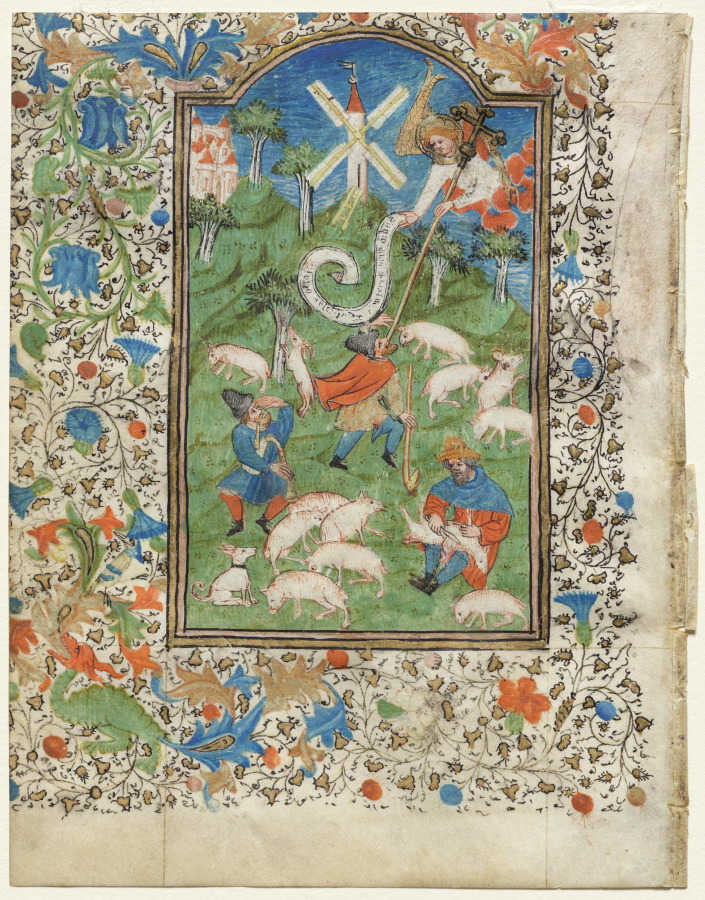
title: Annunciation to the Shepherds: Leaf from a Book of Hours (1 of 6 Excised Leaves)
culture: France, Metz, 15th century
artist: Henri d'Orquevaulx (French)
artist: or Workshop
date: c. 1420–30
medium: ink, tempera, and gold on vellum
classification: Manuscript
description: This leaf survives from what must have been an extraordinarily rich book of hours. The elaborate Passion cycle and Suffrages point to an important patron. Internal evidence within the original calendar and texts indicates that Metz was the probable place of production. Stylistically, the illuminations appear to come from the workshop of Henri d’Orquevaulx, a documented Metz manuscript painter. Compositionally, structurally, and stylistically, the miniatures suggest strong links to Netherlandish illumination. It is not known whether d’Orquevaulx came originally from the Netherlands or whether he simply worked or trained there at some point in his career.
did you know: Books of hours were devotional books popular in the Middle Ages and meant for laypeople, or those not in the clergy.